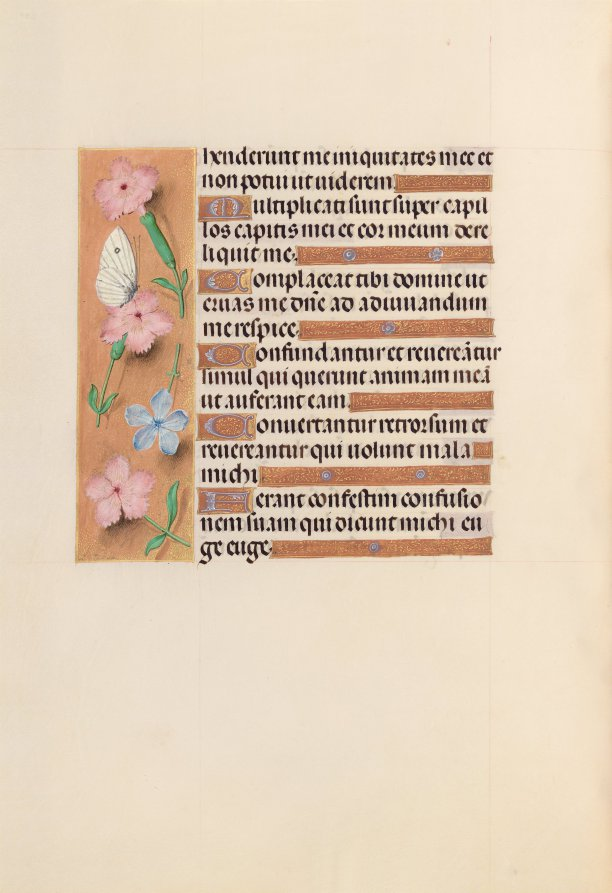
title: Hours of Queen Isabella the Catholic, Queen of Spain: Fol. 240v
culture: Flanders, Ghent and Bruges, late 15th century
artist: Master of the First Prayerbook of Maximillian (Flemish, c. 1444–1519)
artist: and Associates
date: c. 1500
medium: ink, tempera, and gold on vellum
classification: Bound Volume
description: This manuscript was illuminated by a circle of at least five highly organized manuscript painters active in the Flemish cities of Ghent and Bruges. The principal illuminator was Alexander Bening, who painted the majority of the book's miniatures. Manuscripts produced by this circle of artists are renowned for the decoration of their borders, which typically feature a rich variety of realistically-painted flowers, birds, and butterflies. This prayer book, called a book of hours, was intended not for a cleric, but for the private devotions of a lay person-in this case, Isabella the Catholic, Queen of Spain (1451-1504). Isabella's coat of arms embellishes the book's frontispiece. It is unlikely that the book was commissioned by the Queen herself; rather, she probably received it as a diplomatic gift from someone courting her patronage, perhaps Cardinal Francisco Jimenez de Cisneros. A Franciscan friar, Jimenez was dependent upon Isabella for his advancement, first to the post of Queen's confessor in 1492, and then to Archbishop of Toledo in 1495.